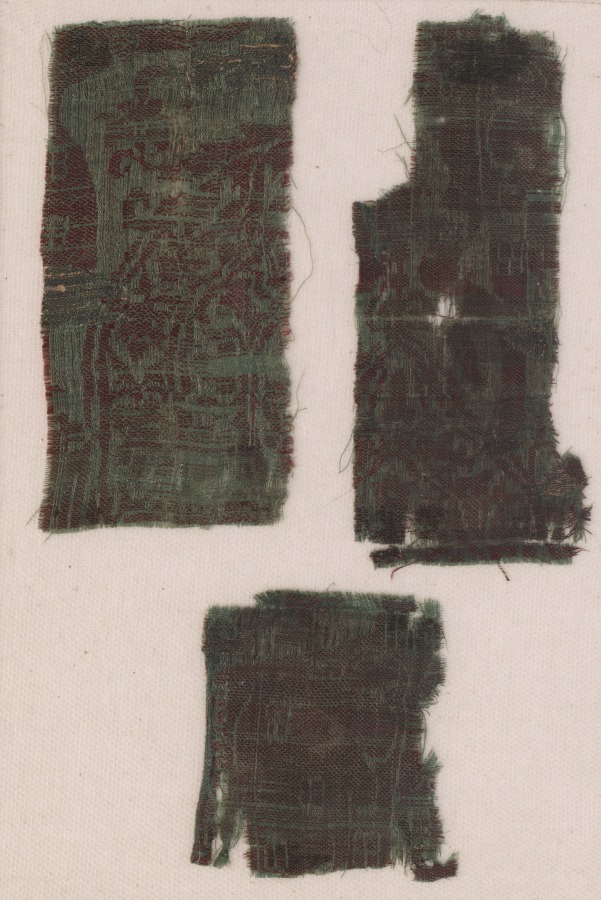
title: Three Fragments of Italian Gothic Silk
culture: Italy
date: 1300s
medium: lampas weave, brocaded; silk and gold thread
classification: Textile